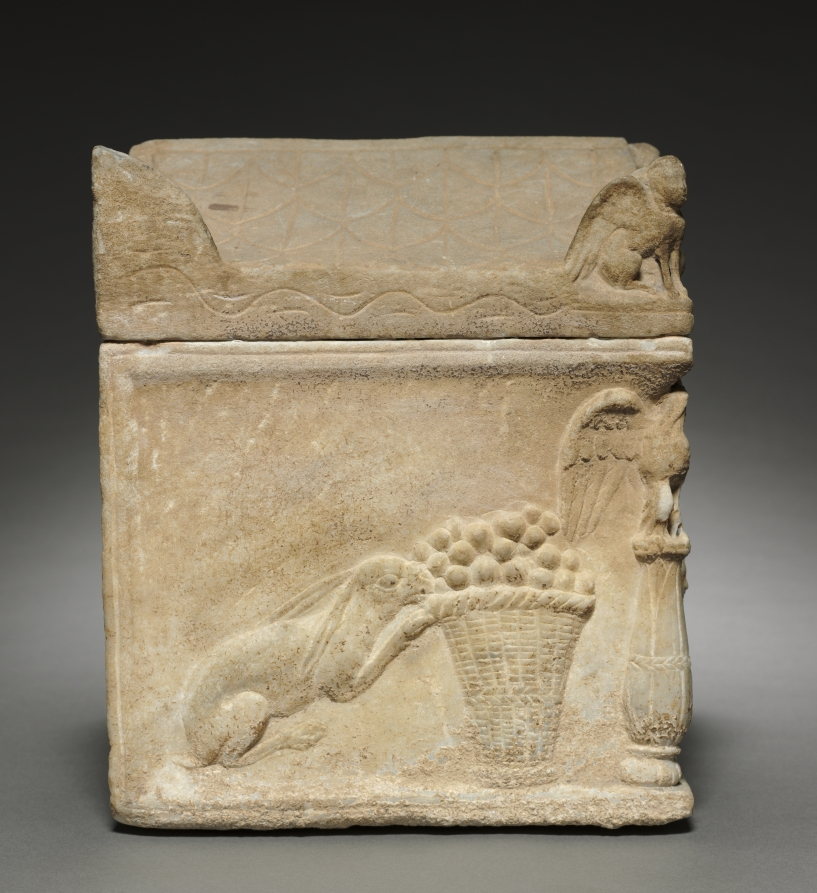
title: Cinerary Box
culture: Italy, Roman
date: 1–100 CE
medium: marble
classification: Sculpture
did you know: The central rectangular plaque would have been inscribed with an epitaph, either painted or carved.